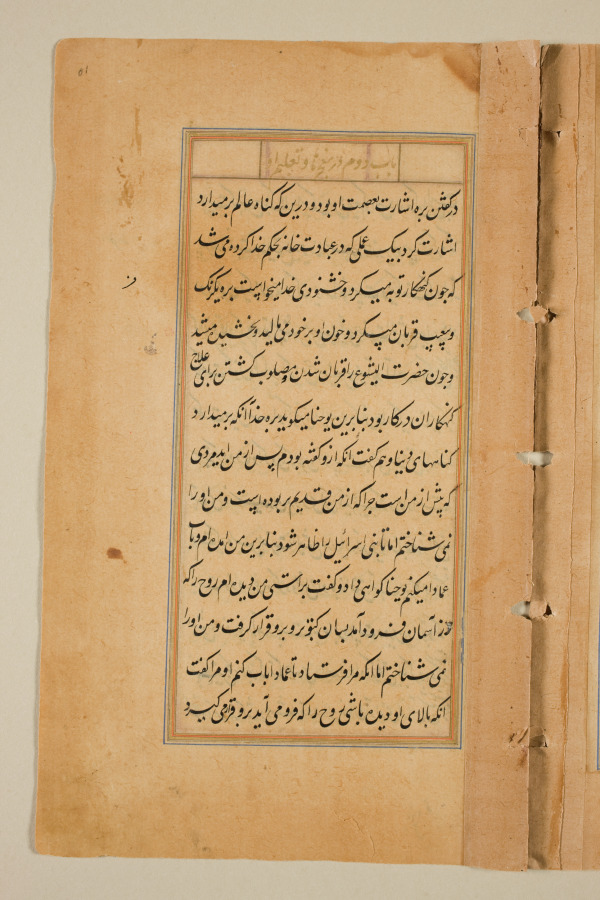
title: Text page from a Mirror of Holiness (Mir’at al-quds) of Father Jerome Xavier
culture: Mughal India, Allahabad, made for Prince Salim (1569–1627)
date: 1602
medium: Ink and gold on paper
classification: Manuscript